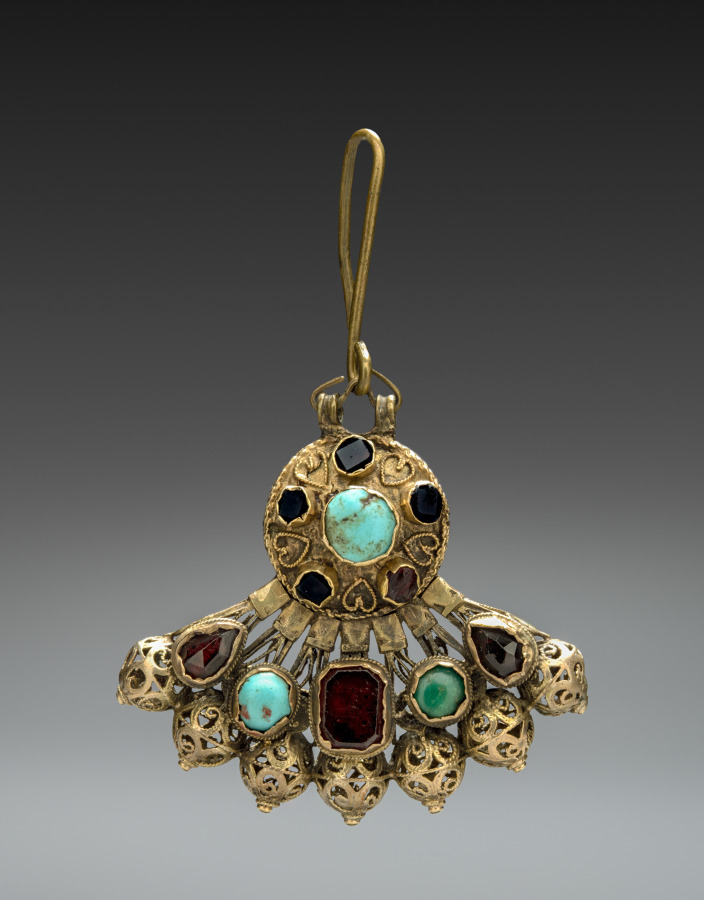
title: Earring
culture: Hungary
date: 1700s–1800s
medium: silver gilt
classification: Jewelry